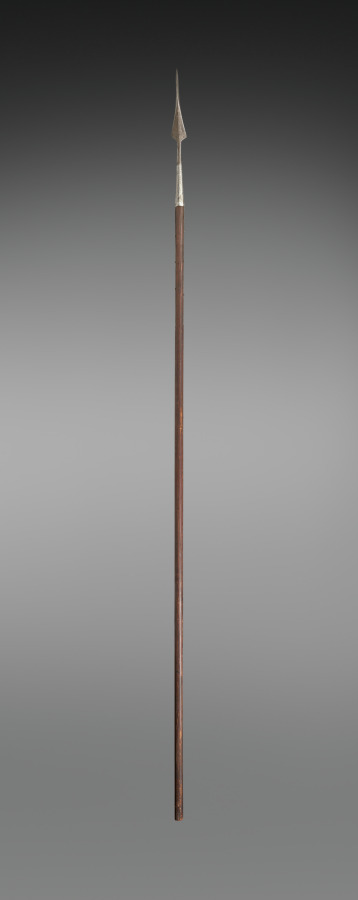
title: Banner with Royal Coat of Arms of Great Britian (pole)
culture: Great Britian, probably England, 18th century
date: 1700s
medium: wood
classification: Arms and Armor